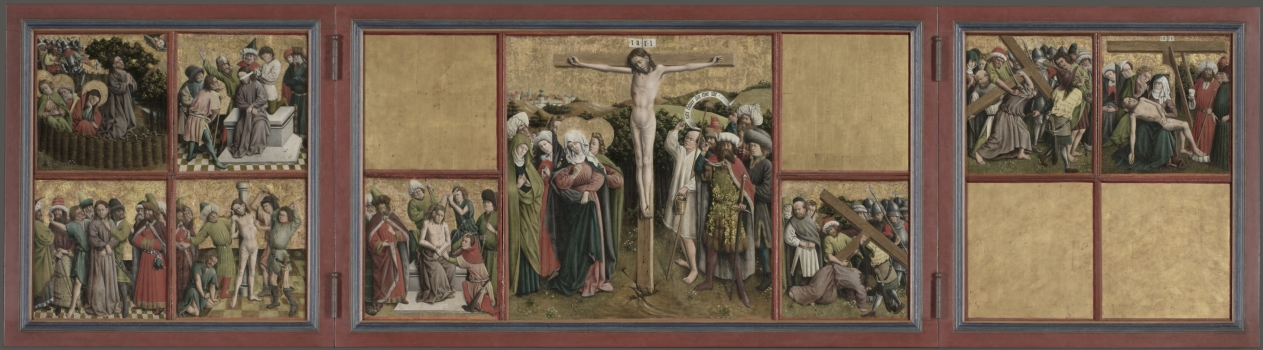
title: Altarpiece with The Passion of Christ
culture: Germany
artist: Master of the Schlägl Altarpiece (German)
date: c. 1440s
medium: oil and gold on wood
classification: Painting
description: The visual focus of this altarpiece is the suffering and death of Christ on the cross. So-called Passion cycles in art include the events leading up to and following the Crucifixion, not only as single subjects but as scenes meant to be read in sequence. Passion cycles were promoted by the two great teaching orders, the Franciscans and the Dominicans, for whom this subject represented the main religious drama of their churches, and also by the German mystics who advocated private contemplation on the humanity and suffering of Christ. The original context for this altarpiece remains unknown, but it was probably made for a religious institution in Westphalia in the Rhine Valley. During the 1870s it was given to the Abbey of Schlägl, near Linz in Upper Austria, from which both altarpiece and artist take their names. The altarpiece is not preserved today in its original format, and some of the individual scenes are missing. Scholars continue to debate the original number of scenes and their sequencing; nine of the original panels have survived.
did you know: In 2012 the museum's conservation department created a new frame that was stylistically more appropriate for this altarpiece.